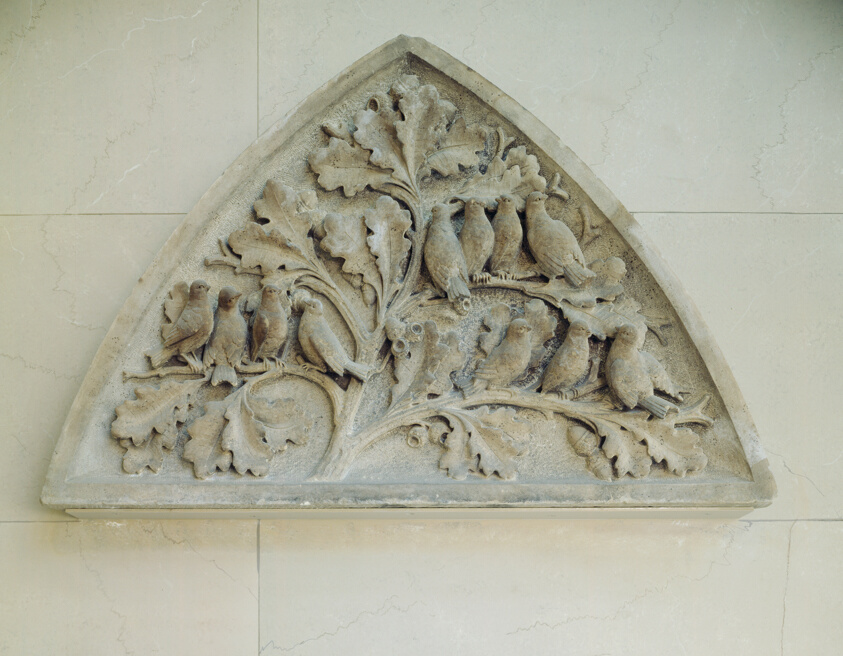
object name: Architectural fragment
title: E. W. Blatchford Residence: Lunette Depicting Autumn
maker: Peter Bonnett Wight; American, 1838-1925; Sculptor: James Legge; American, 1830-1890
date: c. 1875/77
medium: Sandstone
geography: Chicago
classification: architectural fragment; architecture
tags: Chicago